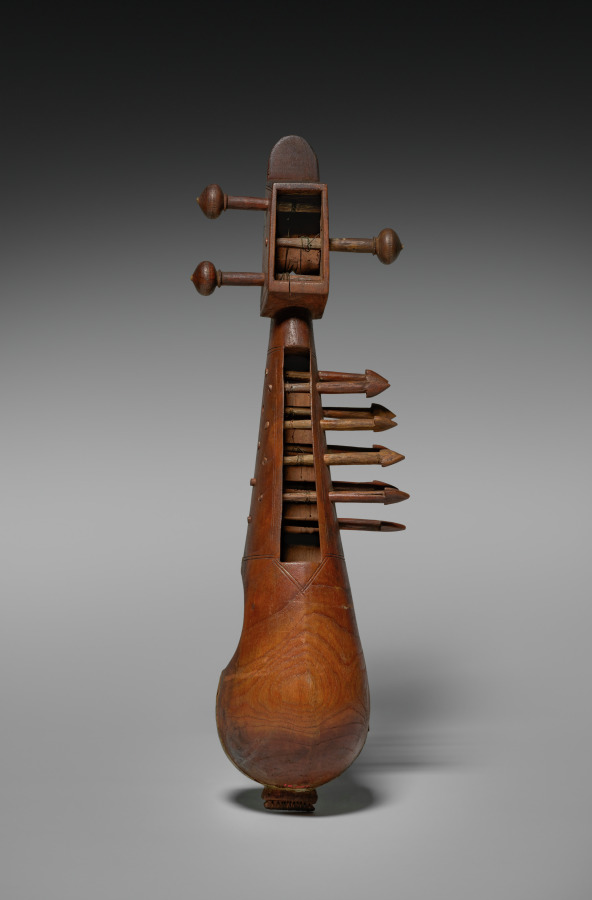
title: Sarangi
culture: India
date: 1800s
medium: Wood with traces of pigment, parchment, bone or ivory, mirrored glass, and copper strings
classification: Musical Instrument